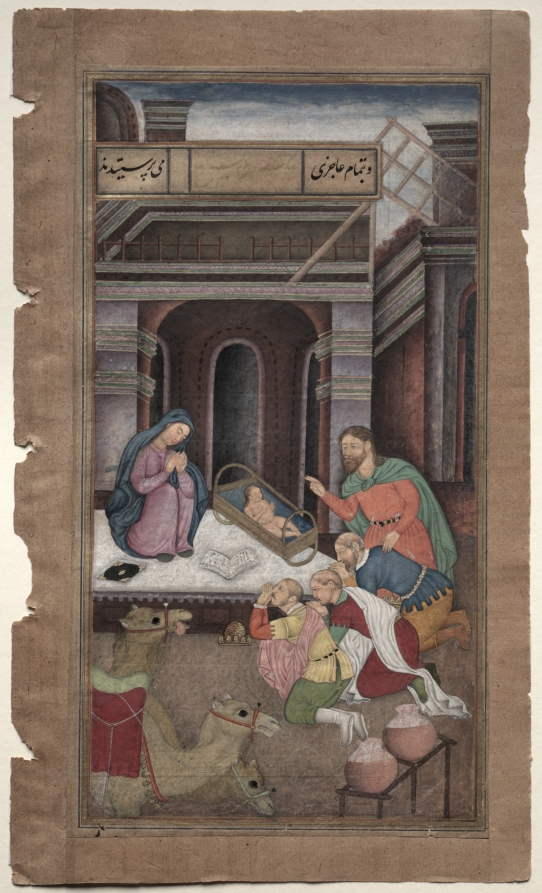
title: The Adoration of the Magi, from a Mirror of Holiness (Mir’at al-quds) of Father Jerome Xavier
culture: Northern India, Uttar Pradesh, Allahabad, Mughal period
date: 1602–4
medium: Gum tempera, ink, and gold on paper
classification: Manuscript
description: In this Nativity scene, familiar in Christian contexts, Mary and Joseph present the infant Jesus to the three Magi, who have placed their crowns on the ground in homage to the King of Kings. The three Magi are portrayed in Portuguese costumes to indicate to a Mughal audience that they are foreigners who believed in Christ. The artist cleverly and humorously indicates that the Magi have just arrived in Bethlehem by depicting their three camels in the bottom corner. One exhausted camel’s tongue hangs out the side of his mouth, while the other two animals lean eagerly toward a pair of water jugs.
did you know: The books next to newborn Jesus indicate that his birth fulfills a prophecy.